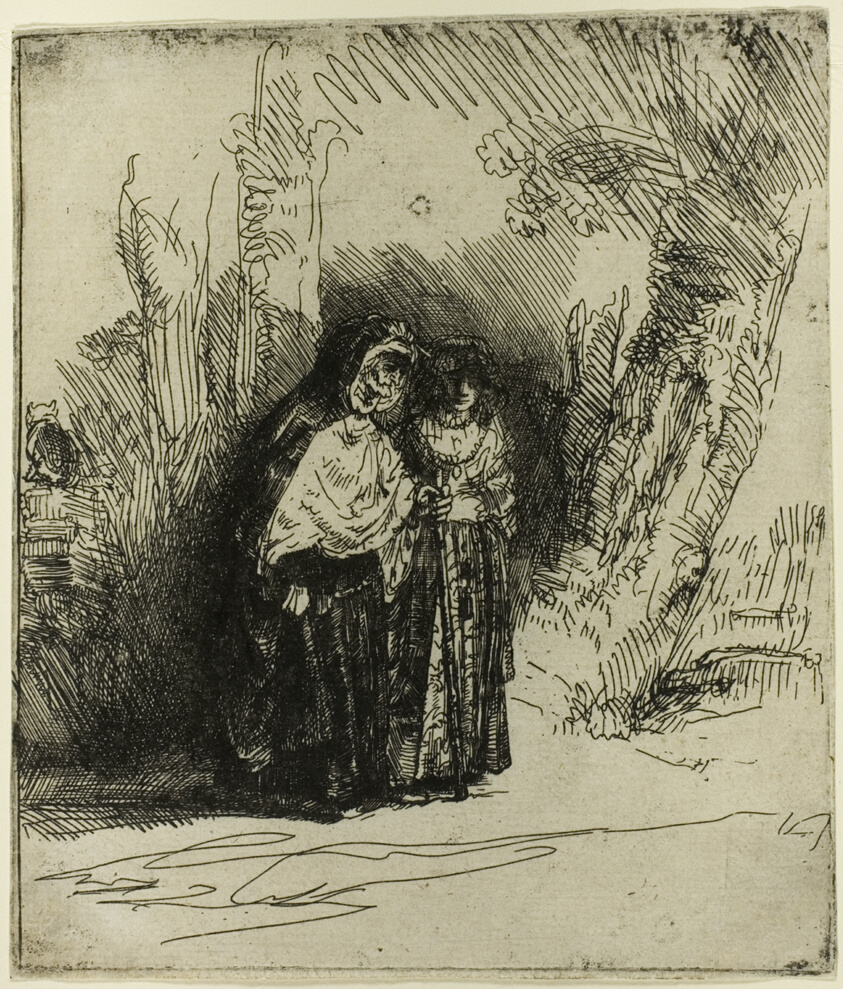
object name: Print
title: The Spanish Gypsy 'Preciosa'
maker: Rembrandt van Rijn (Dutch, 1606-1669)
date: c. 1642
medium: Etching on off-white laid paper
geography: Holland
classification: etching; print; prints and drawing; paper